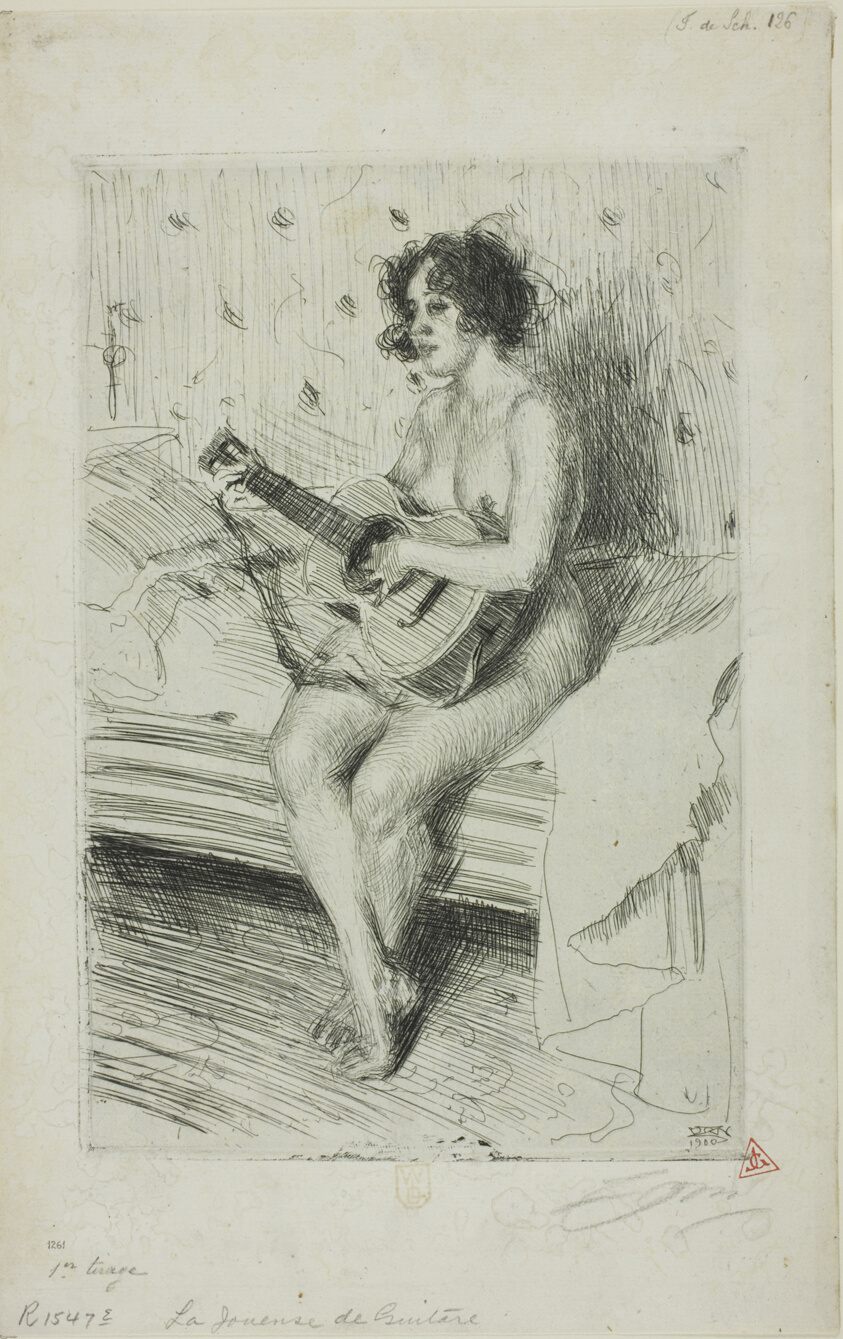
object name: Print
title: The Guitar-Player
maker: Anders Zorn (Swedish, 1860-1920)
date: 1900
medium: Etching on white laid paper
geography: Sweden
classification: etching; print; prints and drawing